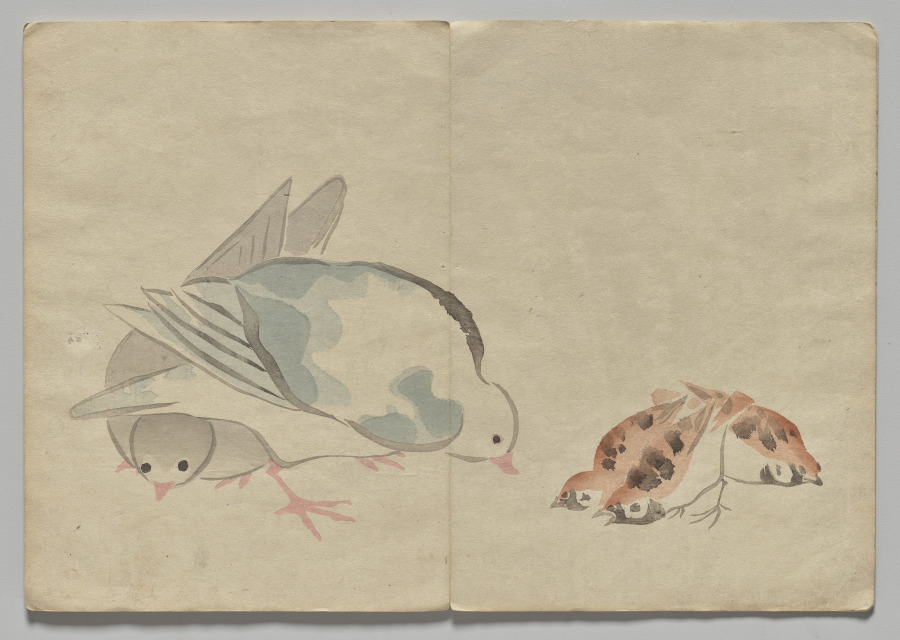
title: Scene from The Kōrin Picture Book (Volume 1)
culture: Japan, Edo period (1615–1868)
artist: Nakamura Hōchū (Japanese, d. 1819)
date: 1800s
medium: color woodblock printed book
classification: Bound Volume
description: Ogata Korin (1658-1716) was one of the most admired artists of Rimpa, or "decorative school painting." These books by the charming later-generation Rimpa artist Hochu record Korin's inventive designs.